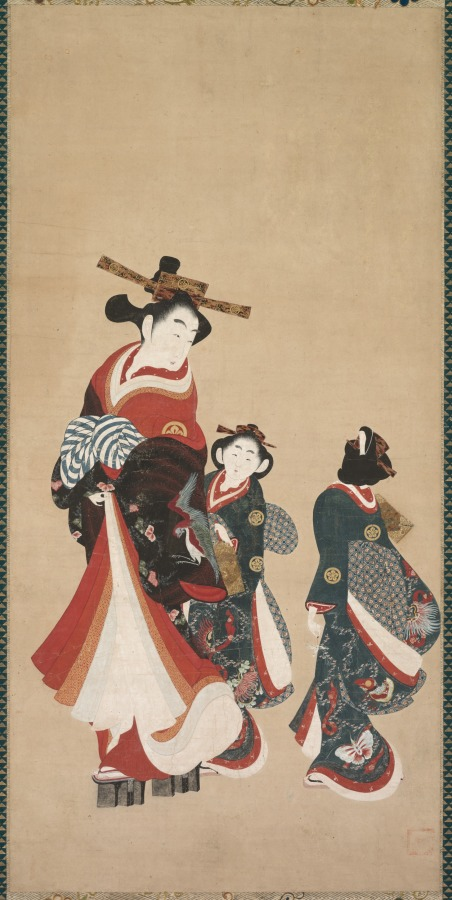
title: Courtesan and Attendants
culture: Japan, Edo period (1615–1868)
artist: attributed to Engetsudō (Japanese)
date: c. 1748–51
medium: hanging scroll; ink and color on paper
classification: Painting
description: The courtesan wears a pair of tall, lacquered wooden clogs and heavy robes, indicating it is winter. The elaborate span of her tortoiseshell comb in her fashionable coiffure enhances her glamorous appearance. Her blue-and-white striped obi is tied in a loose bow in front, typical for her profession. The round, stylized cherry blossom crest of her "house" (brothel), partially visible on her shoulder just above the shawl, also appears on the robes of her two attendants (kamuro). The attendants hold shuttlecocks, used in a game associated with New Year celebrations. One girl stares out at the viewer; the other looks back. The frontal view of the attendant’s face is somewhat rare in ukiyo-e painting and prints.